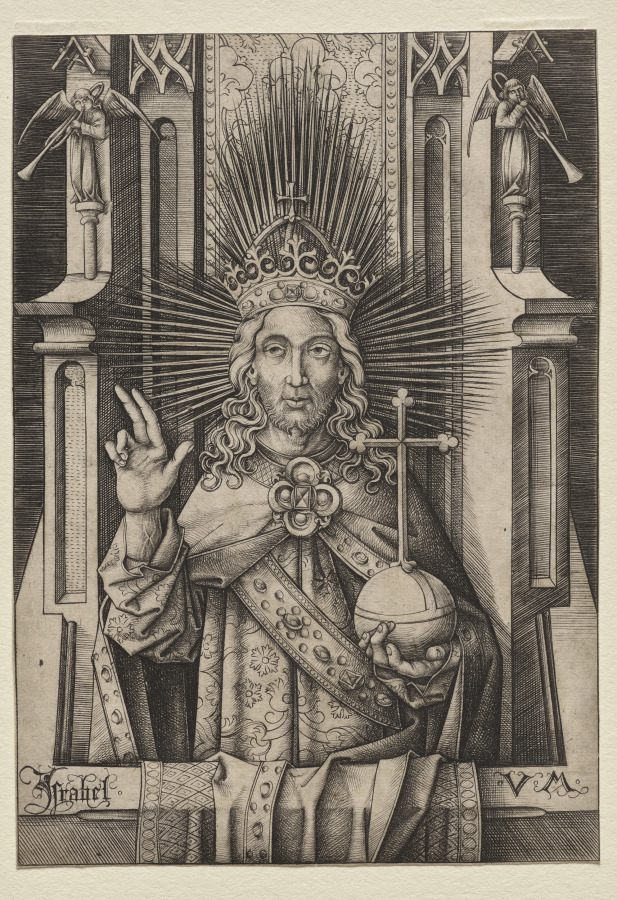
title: Christ the Redeemer (Salvator Mundi)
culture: Germany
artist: Israhel van Meckenem (German, c. 1440–1503)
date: c. 1490–1500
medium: engraving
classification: Print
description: Trained as a goldsmith, Meckenem displayed the decorative potential of his art by engraving a glimmering burst of sword-like rays around Christ’s head and a variety of patterns on Christ’s robe, his jeweled sash, and the tapestries draping the gothic pulpit. The presentation of Christ within ecclesiastic architecture symbolically connects Christ’s authority as Salvator Mundi—Savior of the World—with the Church.